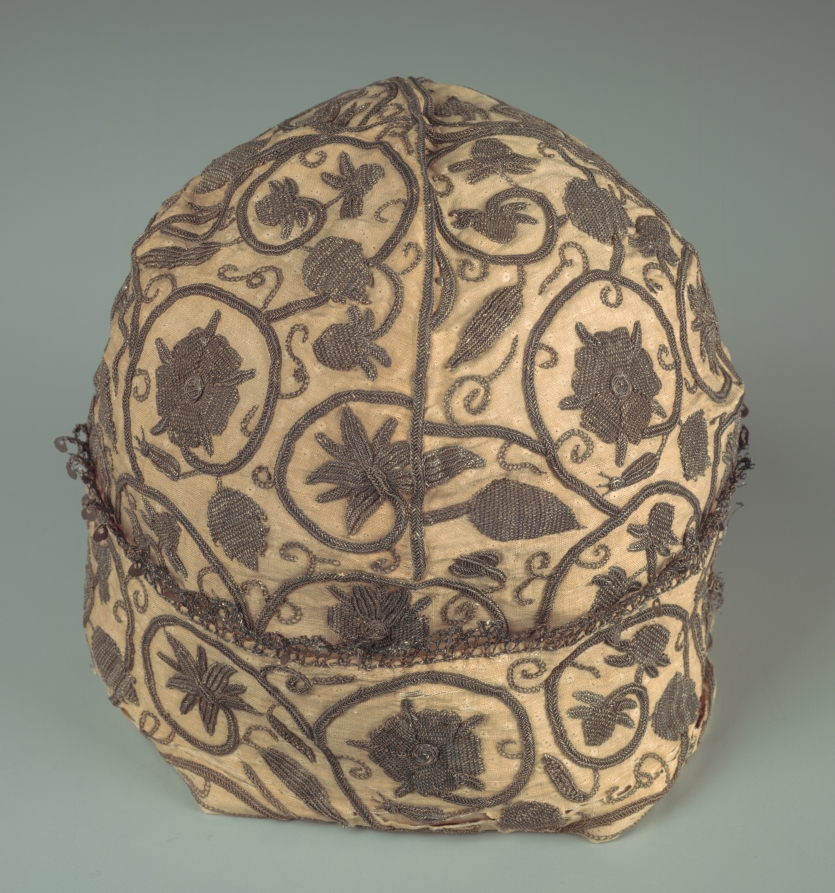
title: Man's Nightcap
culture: England, Elizabethan Period, late 16th century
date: late 1500s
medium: Silk, silver thread, plaited braiding, linen; embroidery: chain and buttonhole stitches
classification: Embroidery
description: According to Elizabethan embroidery scholar Jacqui Carey, this man’s nightcap is constructed of a single piece of embroidered, plain weave linen, cut and folded as is typical of the period. The four points cut into the top edge of the fabric are joined to form the crown while the lower edge is folded back to create the brim. The top edge of the brim is trimmed with bobbin lace. The seams on the crown are hidden with decorative stitching. The floral motifs (rose, borage, pansy and strawberry) set within coiling stems and foliage also is typical of the period. The embroidered motifs are worked with silver metal thread (thin metal strips wrapped around a white silk core). The design is the same in each quadrant. Eight different stitches are used on the nightcap, inclding Elizabethan plaited braid stitch (standard version), Elizabethan plaited braid stitch (variation two), chain stitch, Elizabethan double looped edging (on chain stitch), Elizabethan corded detached buttonhole stitch, Elizabethan spider’s web, five-spoke Elizabethan spider’s web, Elizabethan double ladder with filling, and Elizabethan double Ceylon.